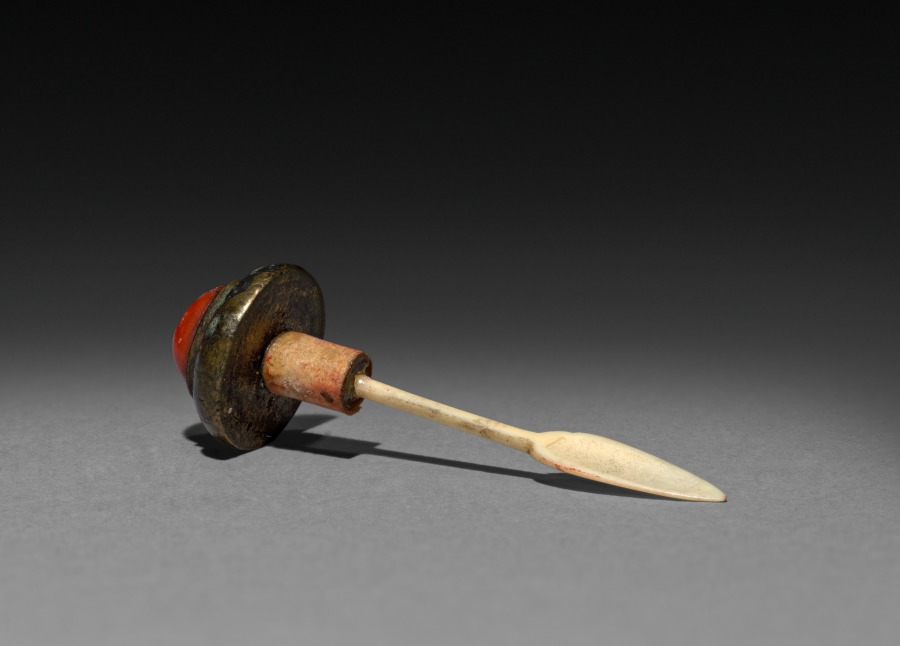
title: Snuff Bottle (stopper)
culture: China, Qing dynasty (1644-1911)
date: 1644–1911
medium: glass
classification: Glass